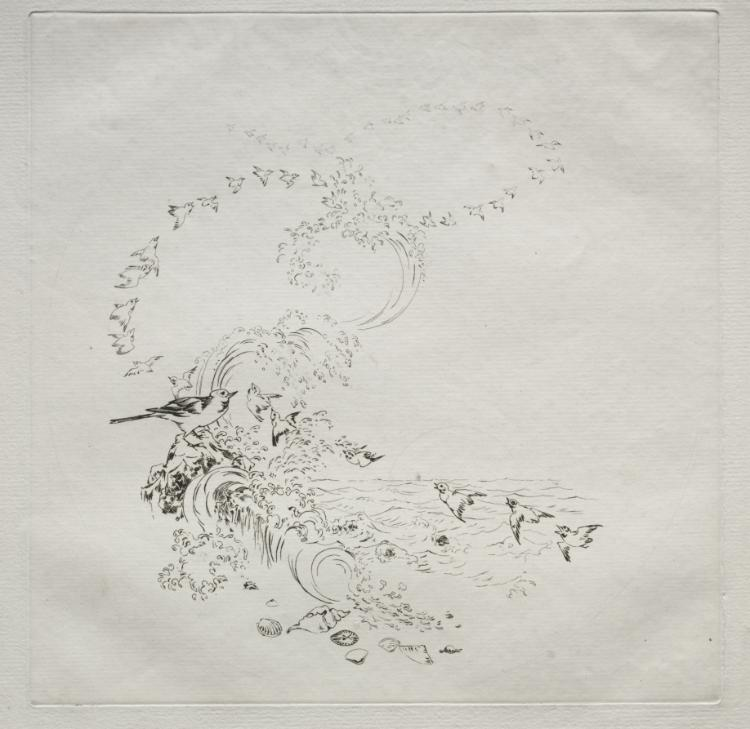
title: Parisian Service (Haviland service): Sunset (no. 11)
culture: France, 19th century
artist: Félix Bracquemond (French, 1833–1914)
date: 1875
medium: etching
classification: Print